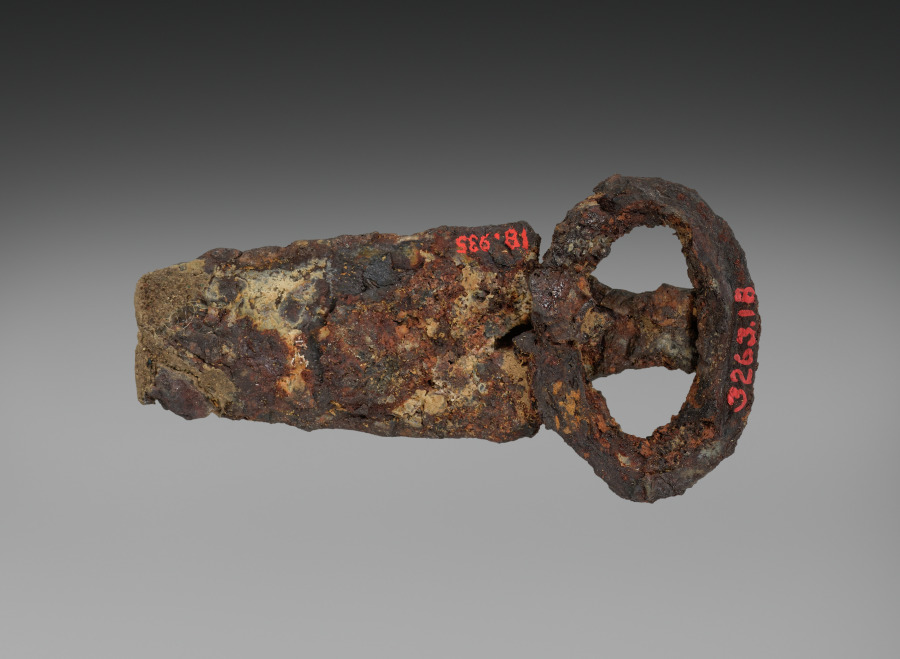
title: Buckle (tongue, loop and clasp)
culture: Merovingian, Burgundian, Migration period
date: 600s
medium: iron with silver overlay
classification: Jewelry